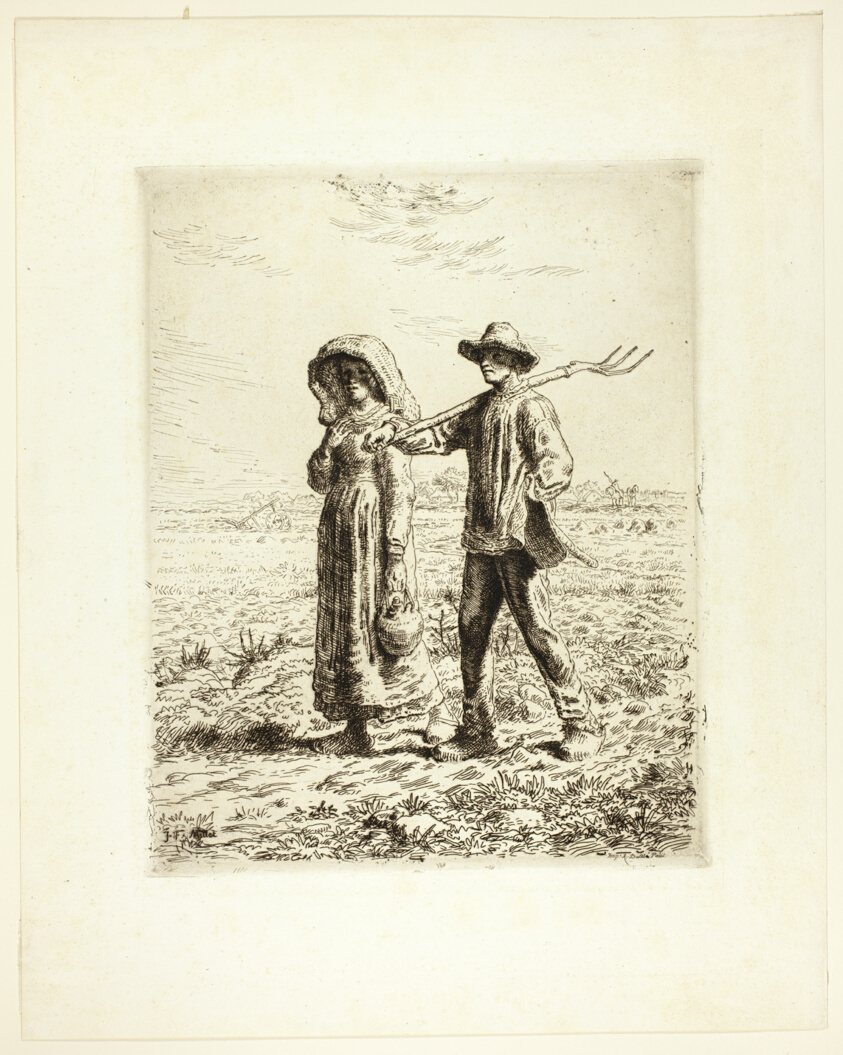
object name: Print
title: Peasants Going to Work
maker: Jean François Millet (French, 1814-1875); printed by Auguste Delâtre (French, 1822-1907)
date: 1863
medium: Etching and drypoint on ivory laid paper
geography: France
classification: etching; print; prints and drawing